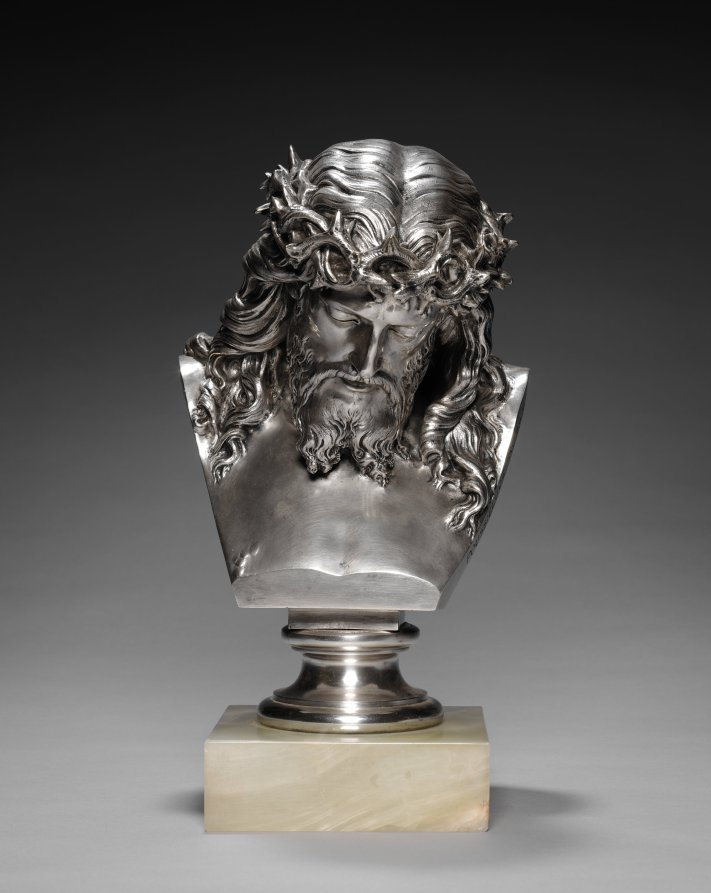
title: Head of Christ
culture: France, 19th century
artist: Jean-Baptiste Clésinger (French, 1814–1883)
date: 1867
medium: silvered bronze, marble base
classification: Sculpture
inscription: Signed in cut of right proper shoulder: "J. Clesinger, 1867"; inscribed in cut of left proper shoulder: "POUSSIELGUE RUSAND PARIS"; struck immediately above circular base: "17662"